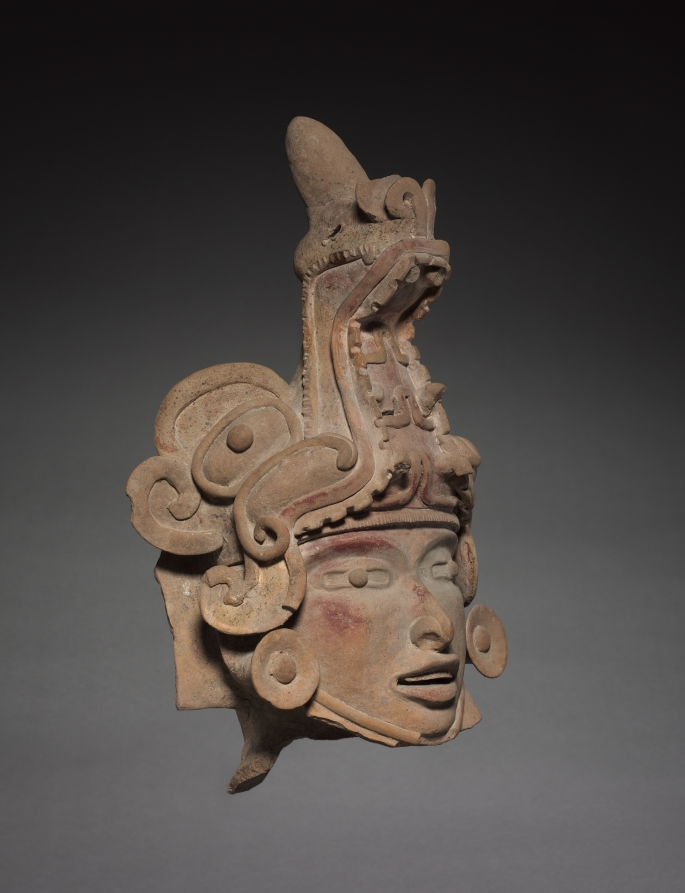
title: Head with Animal Helmet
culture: Mexico, Gulf Coast, San Andrés Tuxtla(?)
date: c. 600–1000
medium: earthenware, pigment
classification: Sculpture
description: The Gulf Coast of Mexico was an important center of ceramic sculpture production for more than 2,000 years. Nearly life-size hollow effigies, produced after about AD 600, are among the most spectacular works from this region. Although the faces were sometimes made with molds, this example appears to be hand-modeled. The mythical serpent helmet indicates that the figure may be a ritual performer.